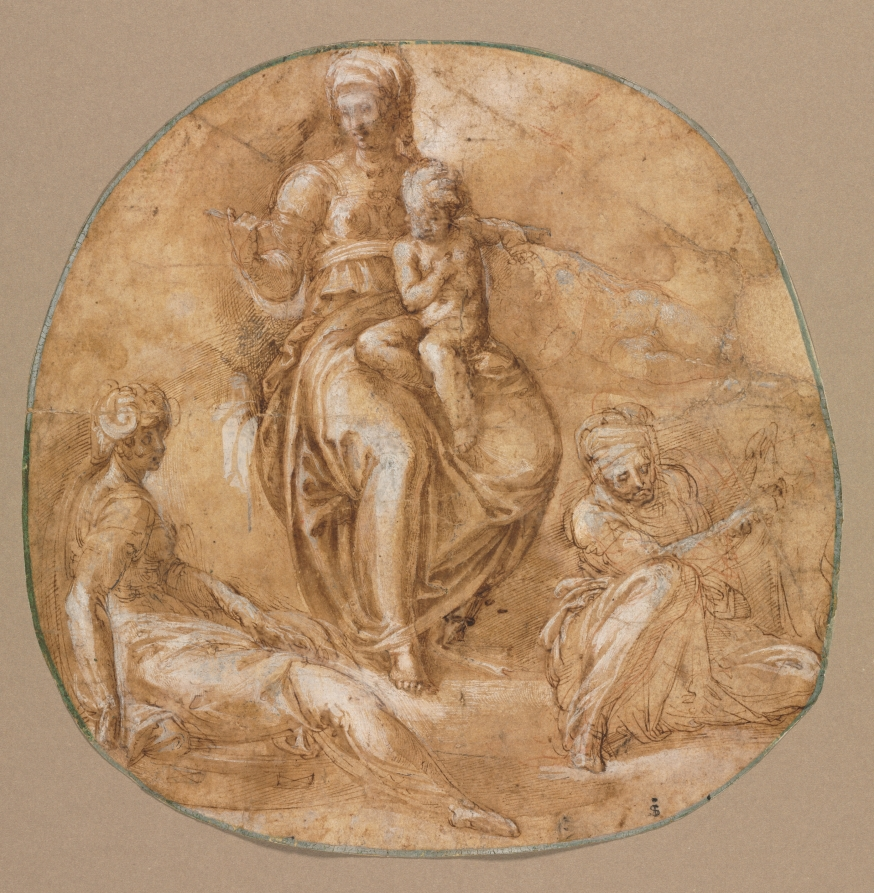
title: Virgin and Child with St. Catherine of Alexandria and Saint Anne (?)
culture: Italy, 16th century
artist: Battista Franco (Italian, c. 1510–1561)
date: c. 1545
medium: pen and brown ink and brush and brown wash with red chalk underdrawing, heightened with white gouache (partially tarnished); pricked (lower part of Virgin)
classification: Drawing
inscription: VERSO OF MOUNT (now removed, partially destroyed), center left, in brown ink: Lot 284 Roscoe Sale / 397 St[ud?]ley Martin / Sale. L' pool 29: / Jan : 1889. [284, 397 underlined] ; lower left, in graphite: The owner of / the V and A Tiepolo album? / H. Macandrew / Feb. 76 [with arrow to next inscription] ; lower left, in graphite: ["Mr. Cheney" in ink inscription describing restoration.] [sideways; brackets part of transcription] ; on sheet attached to verso of mount now removed, in brown ink: Battista Franco / born in Venice 1498 died 1561 family name Semolei / This drawing was in collections of / Lord Spencer, and Richardson_ bought by / Mr Martin at Mr. Roscoes sale 24 Sept / 1816 No 284 in Catalogue, in July 1862 / the lights were restored by an artist under / the advice of Mr. Colnaghi when the / small figure near the child appeared _ this / Mr. Cheney thinks was not part of the design / & purposely rubbed over _ "I Pentimenti" in the / Childs head then appeared also _ Mr. Colnaghi / remarked upon three styles of Masters studied by / Battista Franco - Michael Angelo Raphael & Parmigiano / in this fine Drawing - ; FRAGMENT OF OLD MOUNT (now removed), in brown ink: Battista Franco. ; FRAGMENT OF OLD MOUNT (now removed), in graphite: 1862 / NUDD ; in blue ballpoint: J. RICHARDSON SEN~ / EARL SPENCER ; FRAGMENT OF OLD MOUNT (now removed), in black ink: 1510. - GIOV: BAT: FRANCO. - 1580. [underlined] ; FRAGMENT OF OLD MOUNT (now removed), in black ballpoint: Franco ; VERSO, in graphite: 240 ; FRAGMENT OF OLD MOUNT (now removed), in black ballpoint: Franco ; VERSO, in graphite: 60 [crossed out] ; 45 ^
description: Battista Franco was one of Michelangelo’s most devoted followers: his biographer Giorgio Vasari wrote that he drew every figure on the master’s Sistine Chapel ceiling. In Franco’s own works, such as this drawing, he made new, inventive compositions that emulated Michelangelo without directly copying or quoting his works. The drawing—possibly a study for painted pottery—shows the Virgin Mary and Christ flanked by Saints Anne and Catherine. The unusual, twisting forms of the saints recall the inventive poses that Michelangelo created for many of the saints on the Last Judgment fresco.